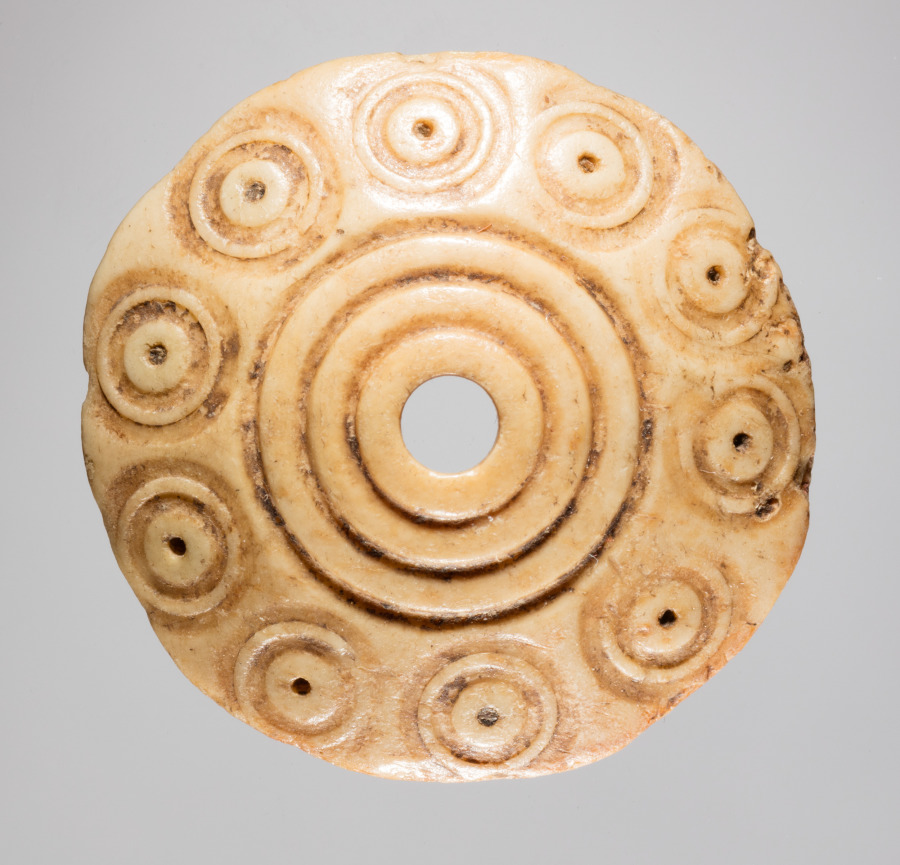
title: Spindle Whorl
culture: Iran, early Islamic period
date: 700s - 900s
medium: bone, incised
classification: Spindle Whorl